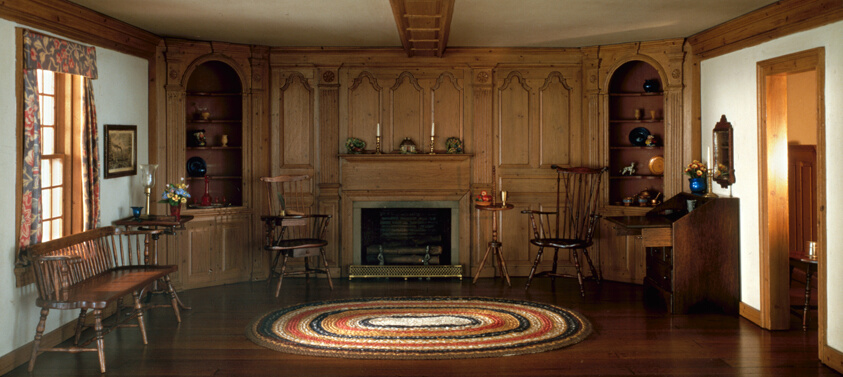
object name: Miniature room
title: A4: Connecticut Valley Tavern Parlor, c. 1750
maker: Designed by Narcissa Niblack Thorne; American, 1882-1966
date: c. 1940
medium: Miniature room, mixed media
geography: United States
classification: miniature; thorne rooms